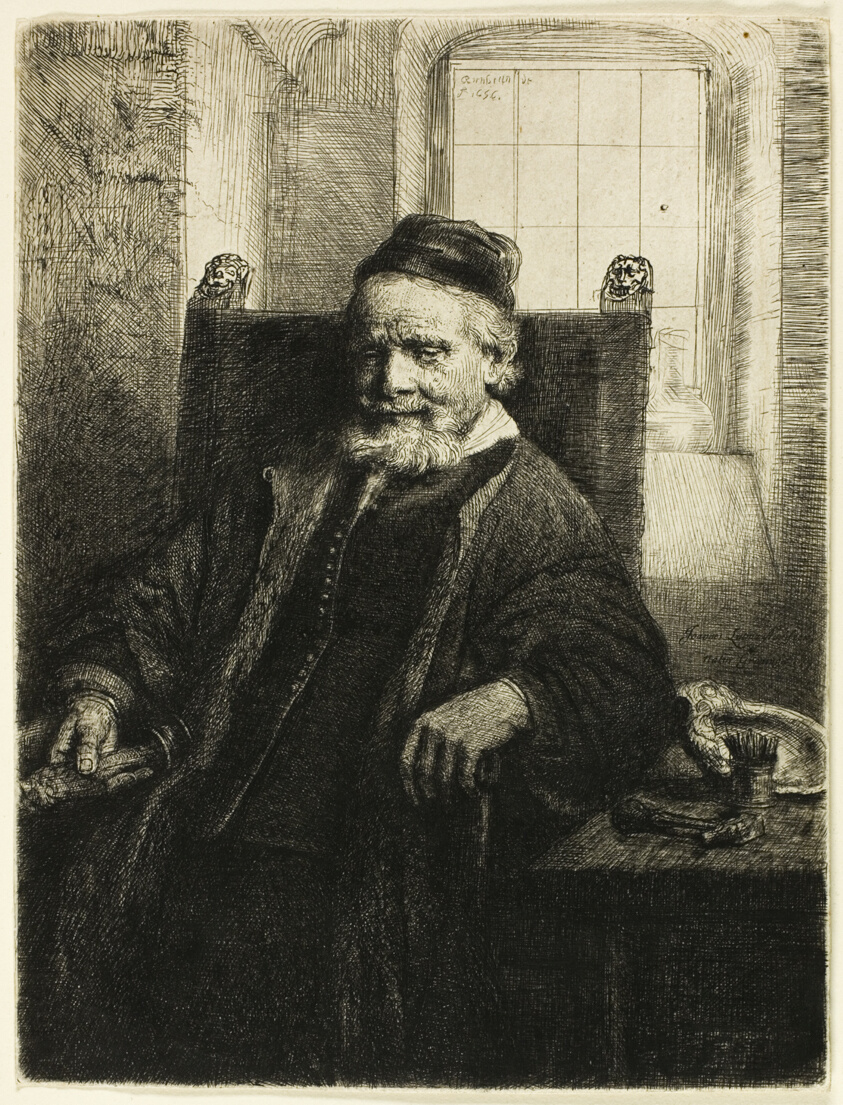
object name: Print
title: Jan Lutma, Goldsmith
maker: Rembrandt van Rijn (Dutch, 1606-1669)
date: 1656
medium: Etching and drypoint on paper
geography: Holland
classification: etching; print; prints and drawing; paper; drypoint